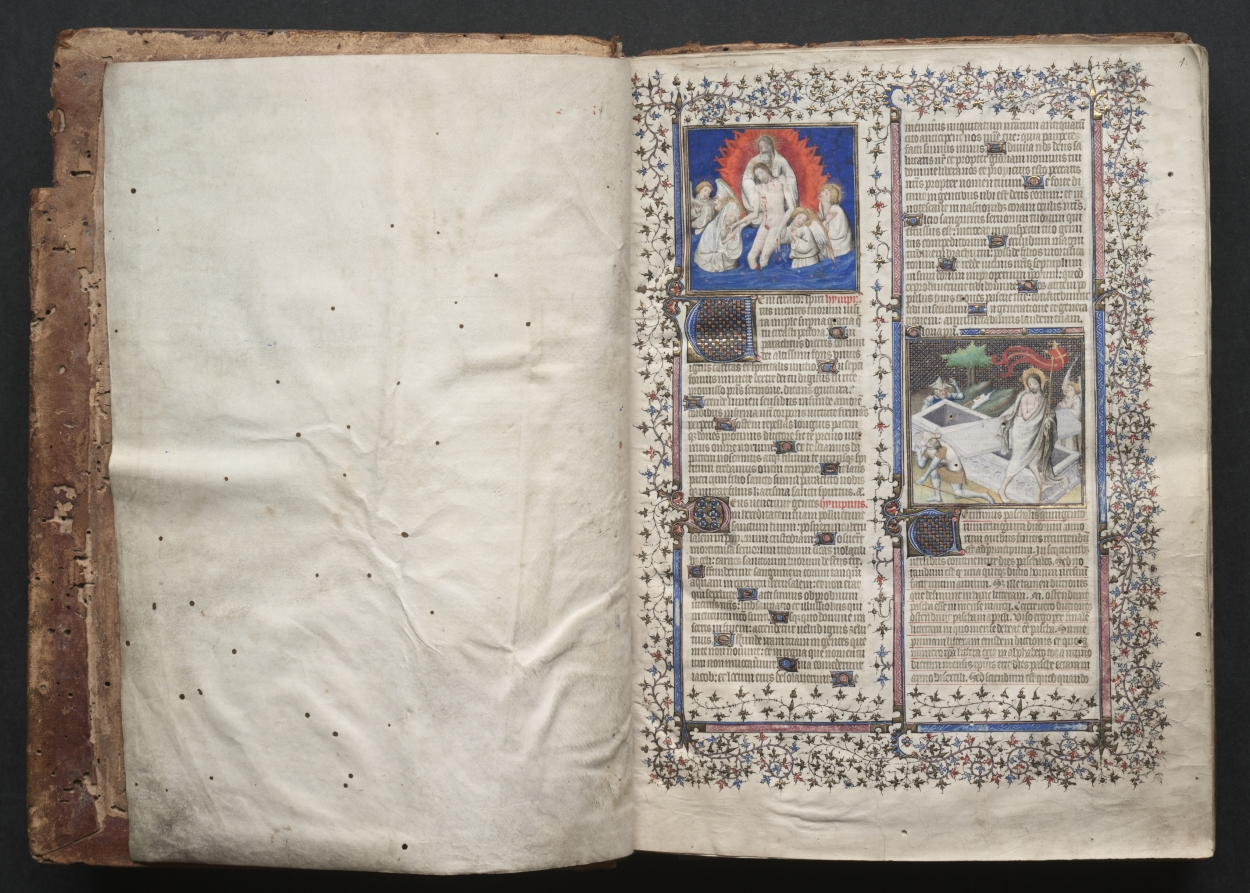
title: The Gotha Missal: Fol. 1r, Trinity and Resurrection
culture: France, Paris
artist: Master of the Boqueteaux (French)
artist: and Workshop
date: c. 1375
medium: ink, tempera, and gold on vellum; blind-tooled leather binding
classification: Bound Volume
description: The style and quality of this manuscript's decoration is typical of deluxe Parisian books made for aristocratic or royal patrons. Most of the book's decoration appears to be the work of the Master of the Boqueteaux, an artist active at the court of King Charles V (died 1380). His style was apparently shared by a number of book illuminators working in and around Paris. It is very possible that the Gotha Missal belonged to Charles V, but is not provable because the manuscript has no royal portraits and lacks a colophon. Given the book's magnificent decoration, however, it would seem that it was produced for a Valois prince, if not for the king himself. The manuscript receives its name from the German dukes of Gotha, its later owners.